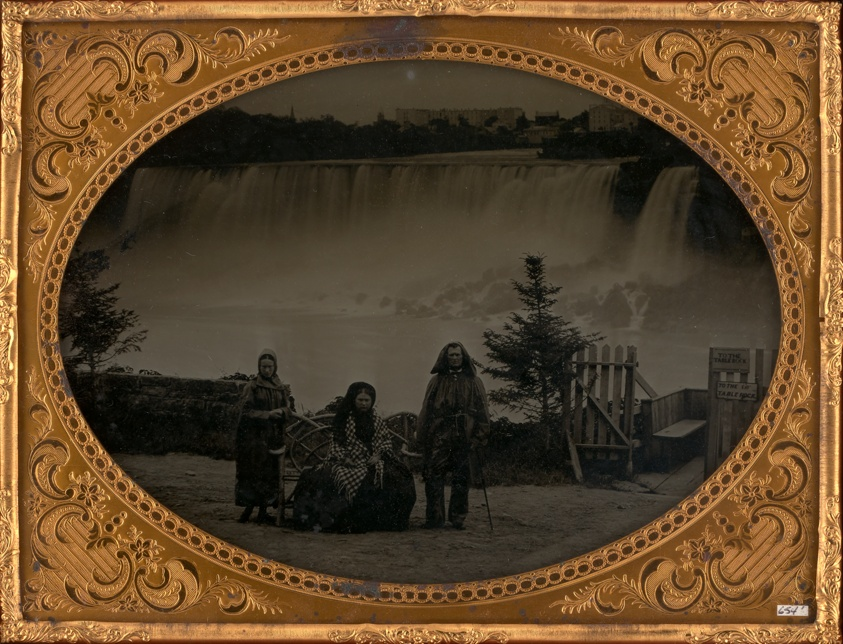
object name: Photograph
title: Untitled (Portrait of a Man and two Women in Front of Niagara Falls)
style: 19th century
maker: Unknown maker; American, 19th century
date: 1870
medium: Ambrotype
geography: United States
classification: portrait; ambrotype; portrait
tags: lundberg collection, Niagara Falls, portrait, portraits, portraits: multiple subjects